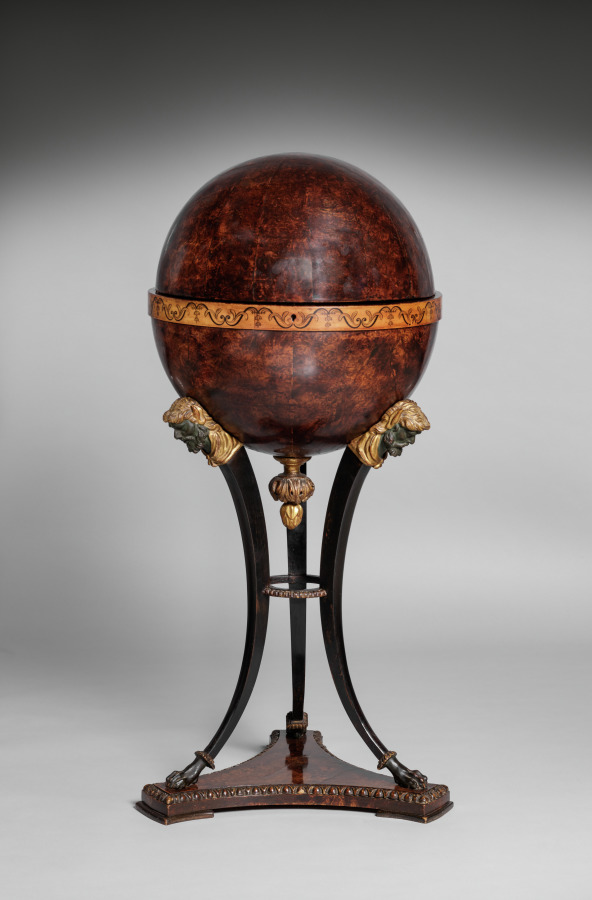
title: Globe Work Table (Globustisch)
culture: Austria, Vienna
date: c. 1810–15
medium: Burl walnut veneer, mahogany, ebony, satinwood, gilt wood, painted wood; mirrored glass; metal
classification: Furniture and woodwork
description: Work tables resembling globes were the usual form for a lady's sewing or writing table around 1800 in Austria. Combining moving parts, secret compartments, and highly finished decoration, these tables were also a way for the cabinetmaker to show off his skill. The tripod supports and temple-like architectural quality of both the exterior and interior decoration reflect the fashionable taste for neoclassical style, or Biedermeier as it was called in Austria, where Vienna was the center of such elaborate furniture production.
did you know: The top half of the globe rotates upward to reveal hidden compartments for sewing tools, threads, and unfinished fabric pieces.